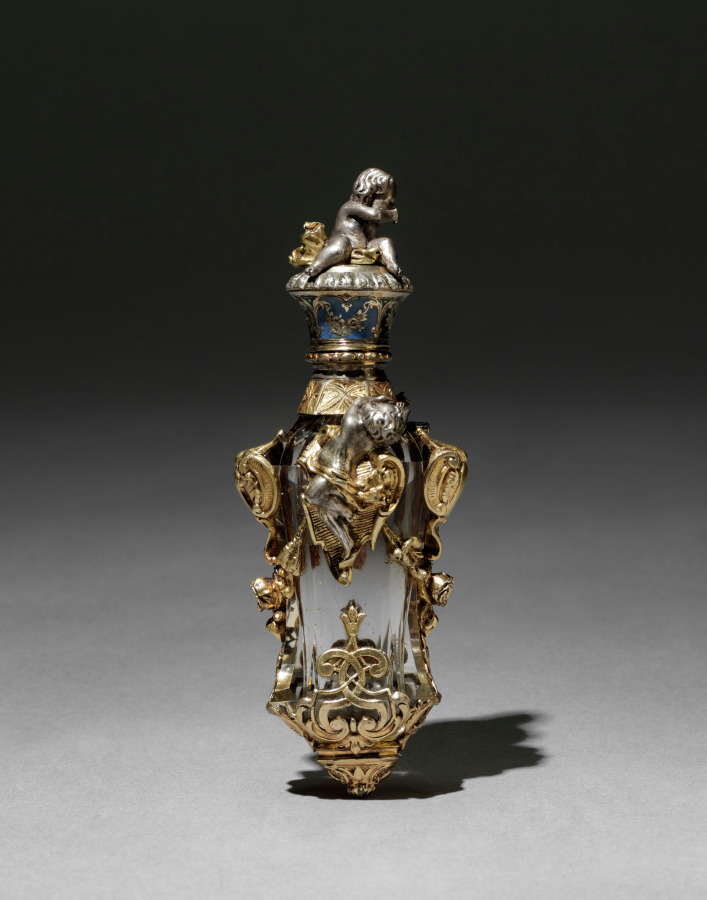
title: Scent Bottle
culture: France, 19th century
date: 1850–1870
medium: glass with enameled silver mounts, partially gilt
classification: Miscellaneous